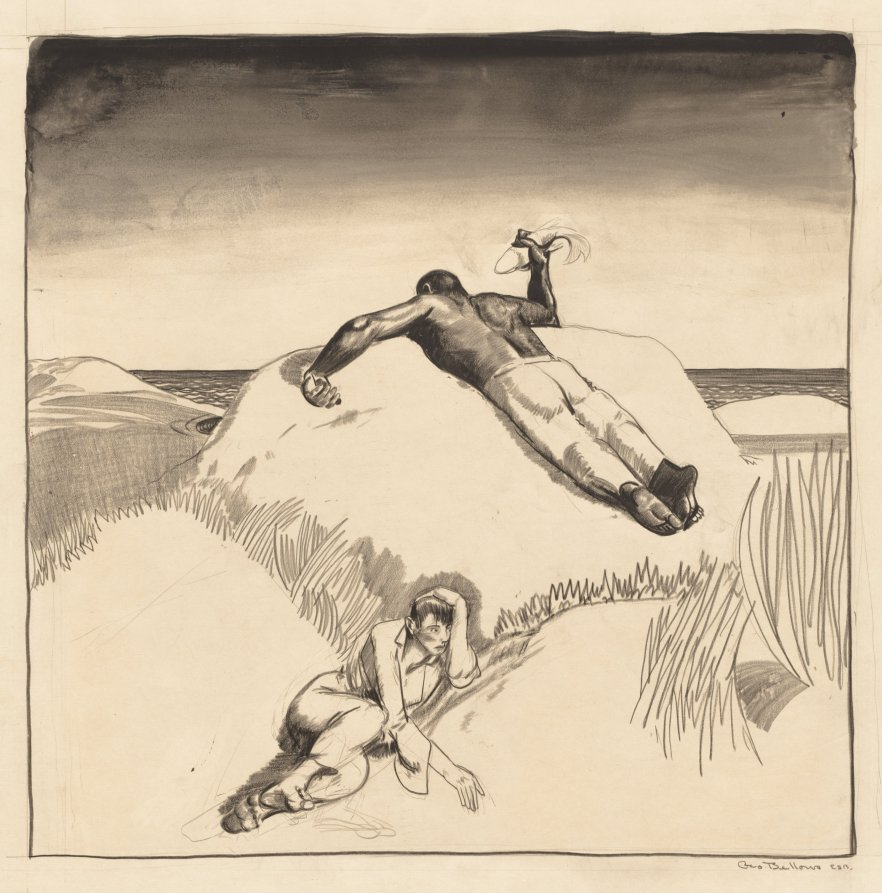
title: Figures on the Beach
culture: America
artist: George Bellows (American, 1882–1925)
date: c. 1900–1925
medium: black crayon and ink with pencil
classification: Drawing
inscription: Signed in pencil at lower right: "Geo Bellows E.S.B."